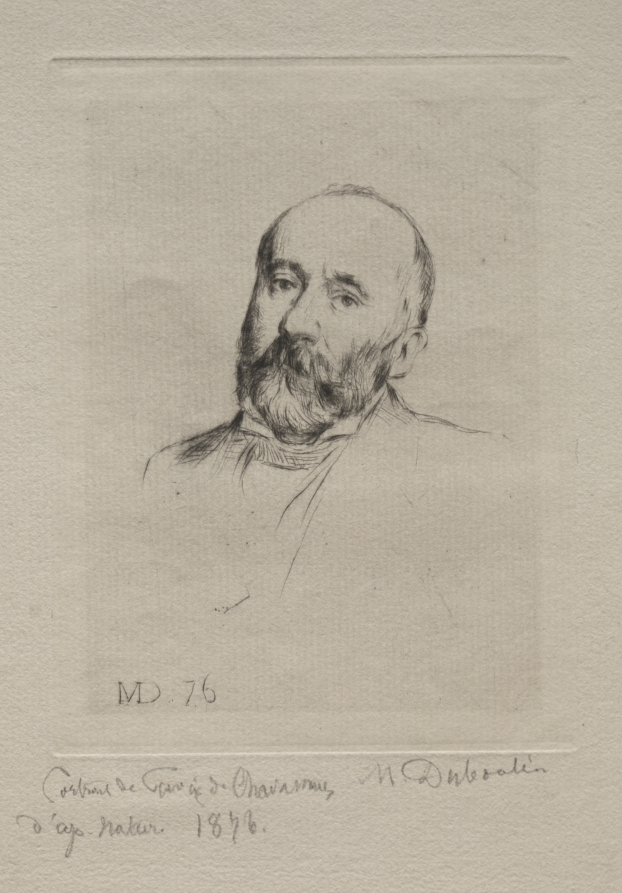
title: Puvis de Chavannes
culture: France, 19th century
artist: Marcellin Gilbert Desboutin (French, 1823–1902)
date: 1876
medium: etching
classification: Print